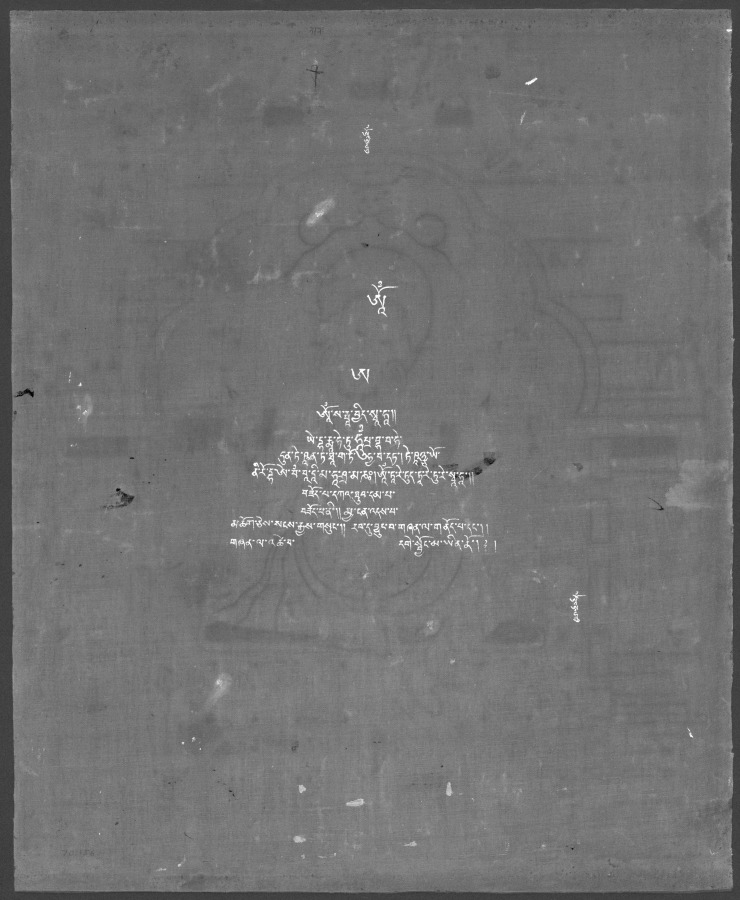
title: Green Tara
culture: Central Tibet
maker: attributed to Aniko (Nepalese, active in Tibet mid- to late 1200s)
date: c. 1260s; mounted, 2020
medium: thangka; gum tempera, ink, and gold on sized cotton; mount: silk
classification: Painting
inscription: Om Ah Hum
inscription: om tare tutare ture svaha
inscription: Om Ah Hum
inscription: Om Ah Hum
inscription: om ah sarva vyida svaha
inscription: ye dharmā hetuprabhavā he- tuṃ teṣāṃ tathāgato hy avadat teṣāṃ ca yo nirodha evaṃvādī mahāśramaṇaḥ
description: For Tibetans, Green Tara is one of the preeminent figures of their Buddhist faith, a radiant savioress who embodies the female form of the perfect, enlightened mind. The Green Tara in the Cleveland thangka—a Tibetan devotional painting on cloth—specifically dispels fear and provides protection, just like her mantra inscribed on the back side of the painting. Her green color and fear-not gesture link her to the cosmic Buddha of the North, enshrined above her head. Most scholars agree that this work was painted by the celebrated Nepalese artist known as Aniko.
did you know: The tiny monastic figure under Green Tara's right hand commissioned the painting.